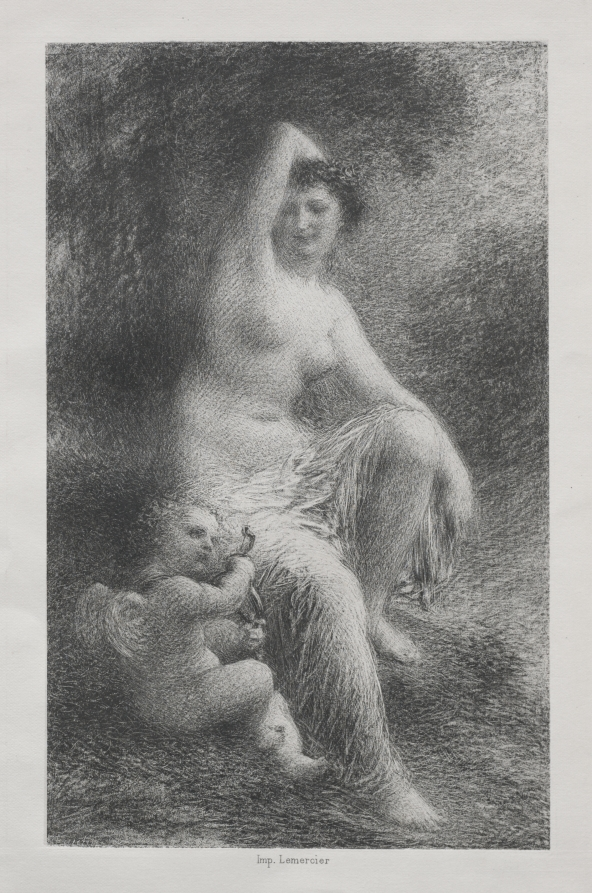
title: Venus and Cupid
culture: France, 19th century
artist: Henri Fantin-Latour (French, 1836–1904)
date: 1892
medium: lithograph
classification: Print